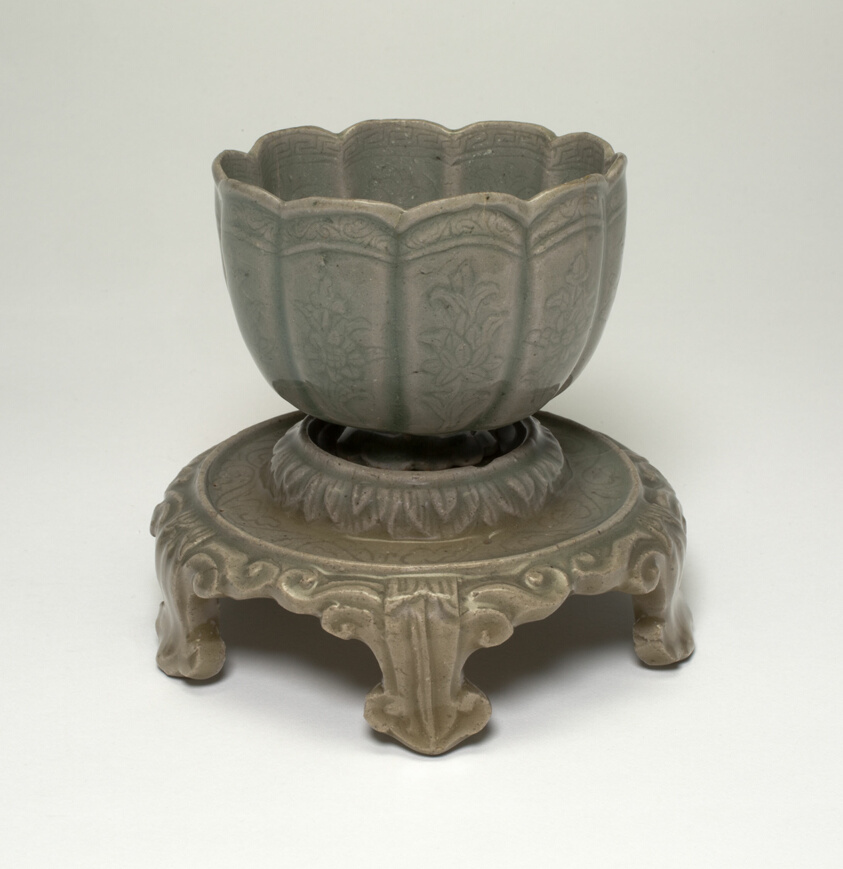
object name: Decorative Arts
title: Lobed Cup and Stand with Lotus Motif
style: Korean (culture or style)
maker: Korea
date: Goryeo dynasty (918–1392), mid–12th century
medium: Stoneware with celadon glaze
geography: Korea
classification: drinking vessel; asian art; ceramics; decorative arts